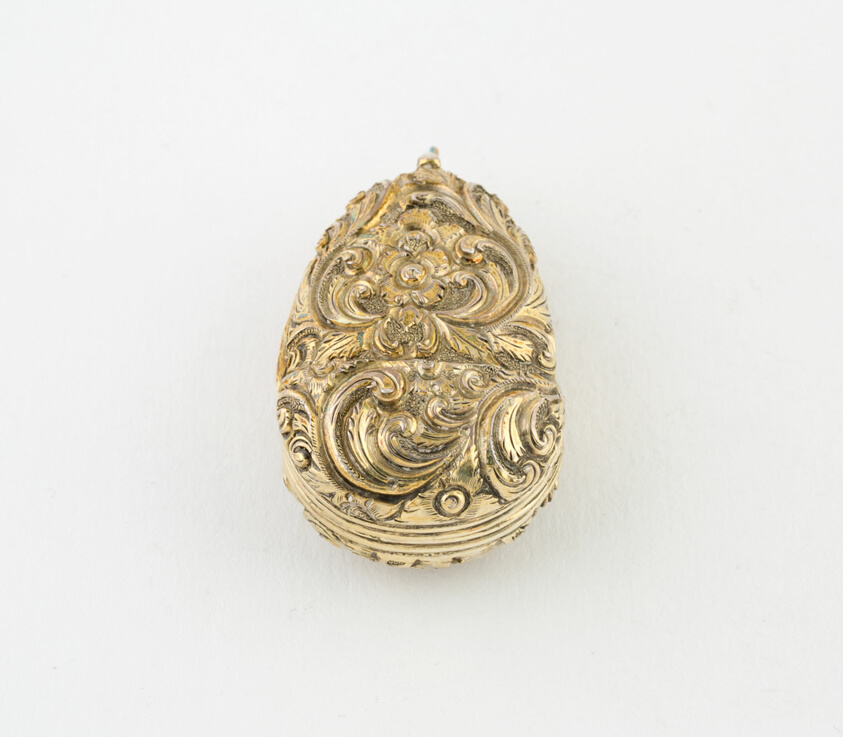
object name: Metalwork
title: Vinaigrette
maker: Probably Matthew Linwood; Probably Birmingham, England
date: c. 1805/20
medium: Silver gilt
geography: Birmingham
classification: vinaigrette (container for health care); container for personal use; box; european decorative arts; metalwork; silver; decorative object/ornament